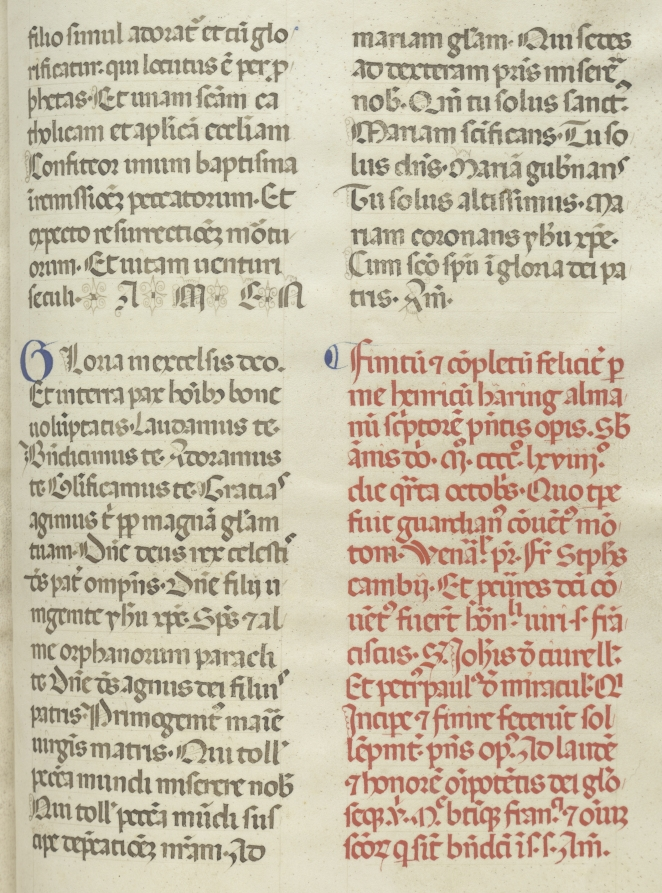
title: Missale: Folio 400: Colophon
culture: Italy, Perugia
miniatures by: Bartolommeo Caporali (Italian, c. 1420–1503)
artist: assisted by Giapeco Caporali (Italian, d. 1478)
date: 1469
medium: ink, tempera and burnished gold on vellum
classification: Bound Volume